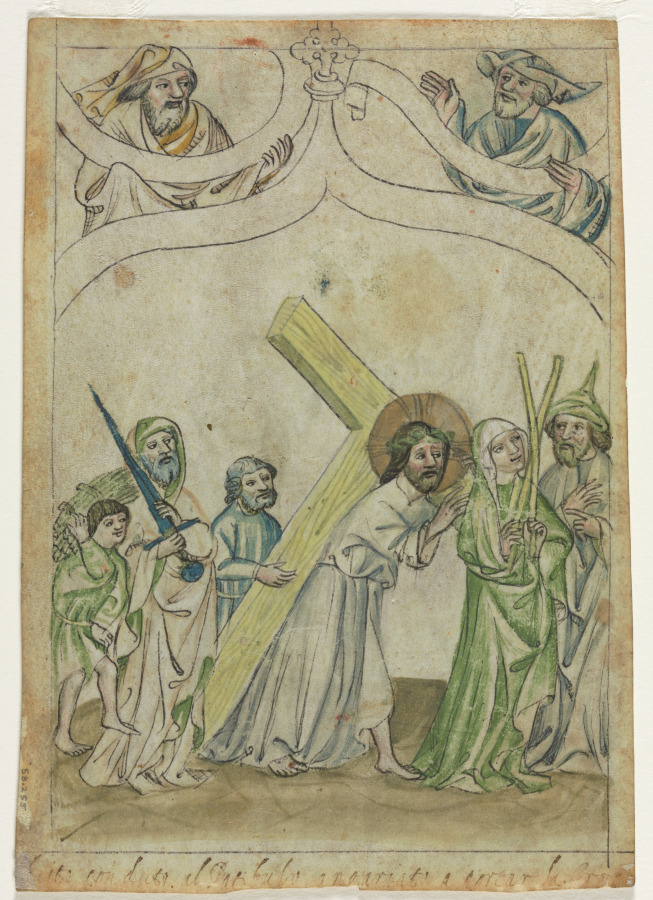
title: Single Leaf from a "Biblia Pauperum": Christ Carrying the Cross (verso)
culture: Germany, Bavaria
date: c. 1410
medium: ink and tempera on vellum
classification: Manuscript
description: Also known as the "Poor Man's Bible," the Biblia Pauperum was a simple picture book used to explain biblical prophecies and symbolism. These volumes served as an aid for preachers to demonstrate the unity of the Bible. The iconography of these popular books juxtaposed two Old Testament scenes with one from the life of Christ. In this example, the image of Christ carrying the cross is inserted between Abraham and Isaac on the way to sacrifice (on the left) and Elijah with the widow of Zarephath (right). The Biblia Pauperum appeared first in manuscript form in the 1200s, became a popular picture book with miniatures in the 1300s, and after 1450 it emerged as a print book with woodcuts.